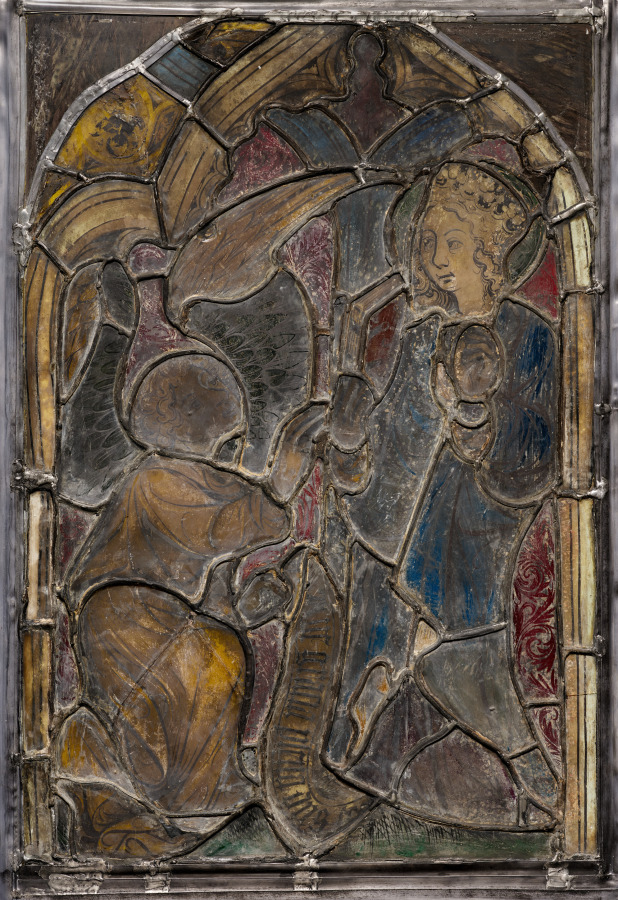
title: The Annunciation from the Parish Church of Maria am Waasen in Leoben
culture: Austria, Styria, 15th century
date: c. 1410–20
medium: stained glass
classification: Glass